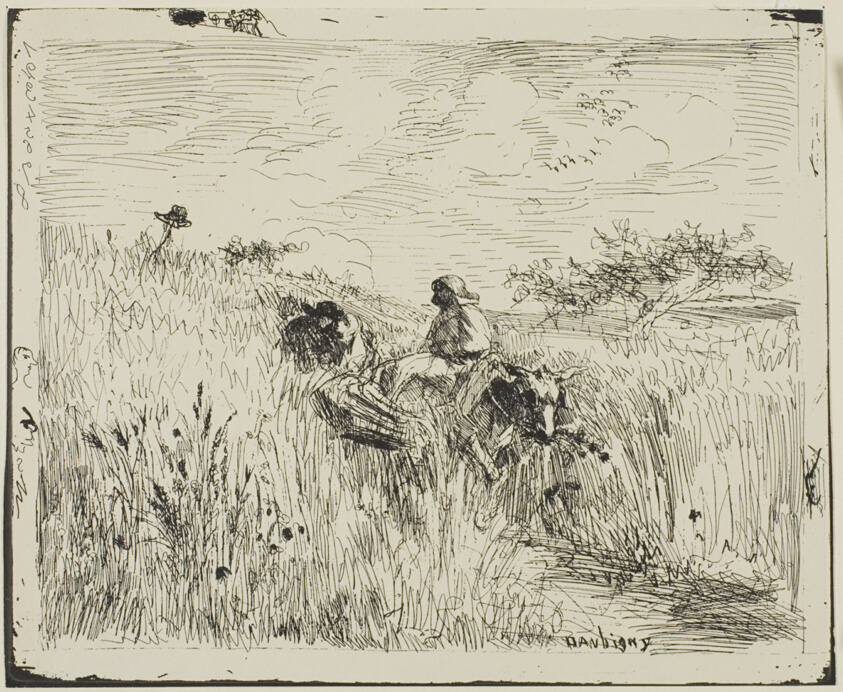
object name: Print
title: Path Through the Wheatfield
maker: Charles François Daubigny (French, 1817-1878)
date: 1862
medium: Cliché-verre on ivory photographic paper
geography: France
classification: cliché-verre; print; prints and drawing